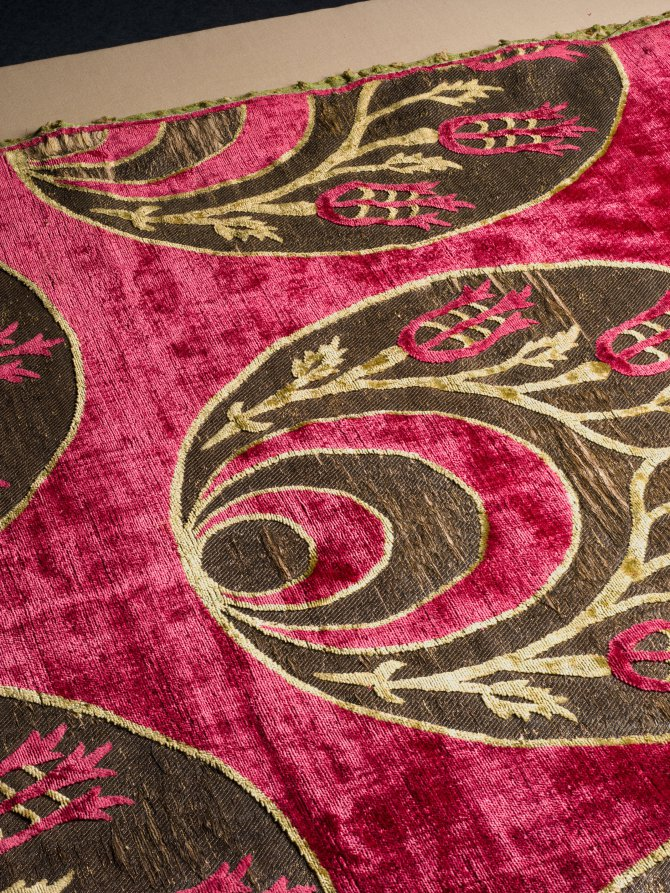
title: Brocaded velvet cushion cover with crescents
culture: Turkey, Istanbul or Bursa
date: 1525–75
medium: velvet, brocaded: silk, gilt- and silver-metal thread, and cotton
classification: Velvet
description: This cushion cover is one of the earliest and highest quality examples that has survived. The vibrant pattern displays large crescents inscribed with smaller crescents and elegant rosebuds on a leafy vine. The six-pointed lappet designs across each end identify its function as a cover for a cushion on a divan, the equivalent of a Western sofa. The elegant yet lively quality of the drawing, velvet weave, and dense metal thread indicate that it was made near the height of Ottoman silk textile production in the mid-1500s.